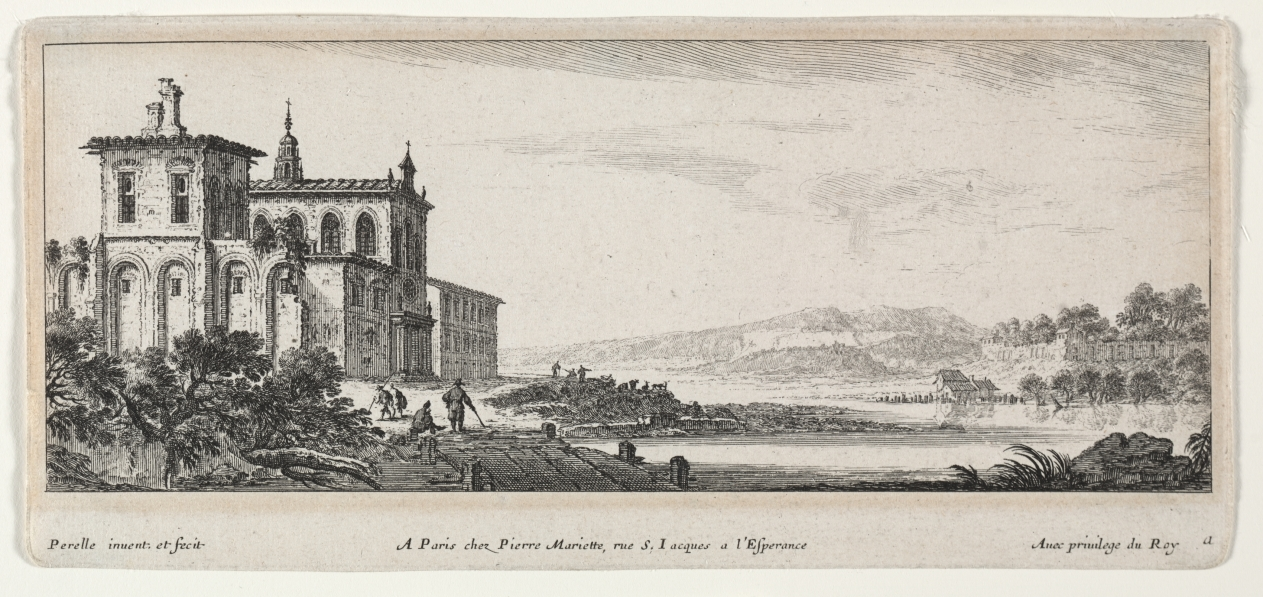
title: River Scene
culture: France, 17th century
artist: Gabriel Perelle (French, c. 1603–1677)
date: 1600s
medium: etching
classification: Print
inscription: inscribed below image: Perelle invent. et fecit (l.l); A Paris chez Pierre Mariette, rue S. Jacques à l'Esperance (l.c); Avec priviledge du Roy (l.r)